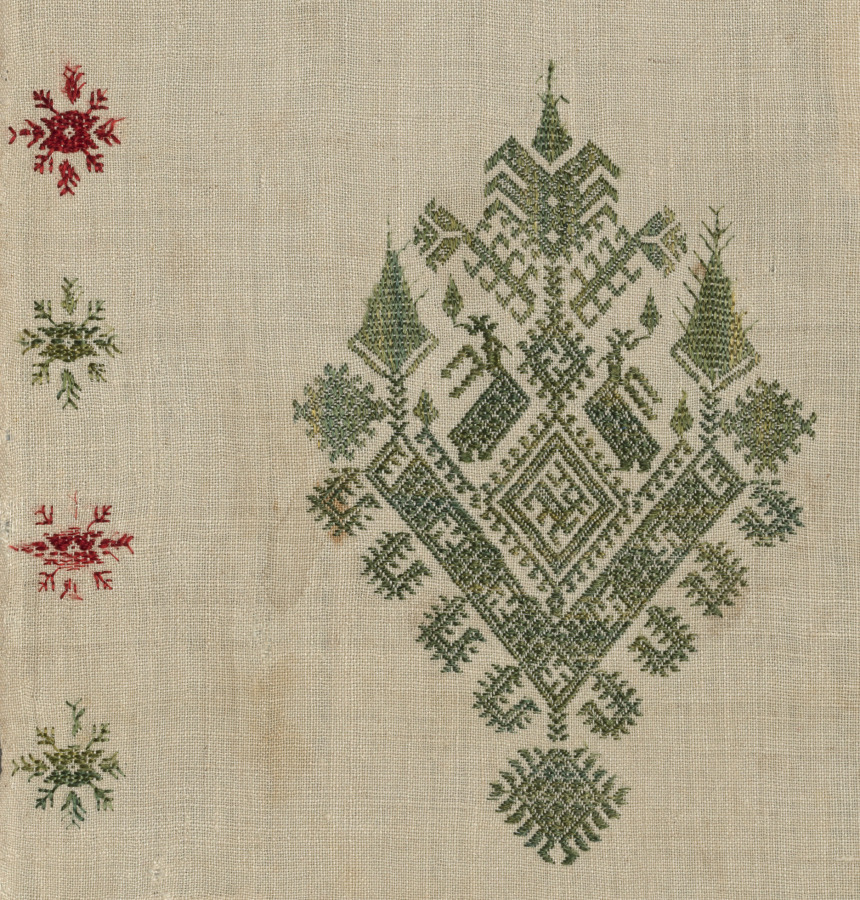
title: Portion of a Bed Tent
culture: Greece, Cyclades Islands, Pholegandros, 17th-18th century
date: 1600s - 1700s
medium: embroidery: silk on linen tabby ground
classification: Embroidery